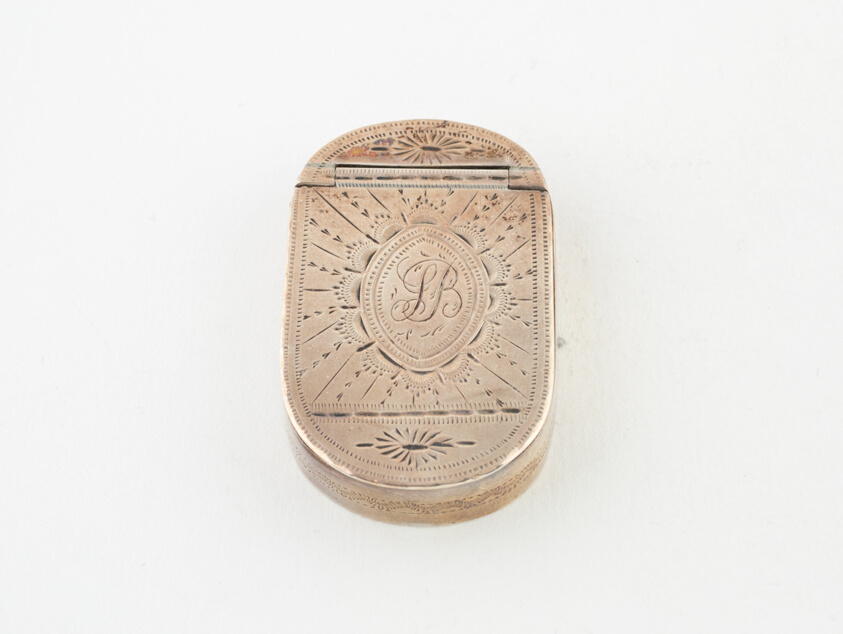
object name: Metalwork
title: Box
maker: Samuel Pemberton (Birmingham, England)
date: c. 1797/98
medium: Silver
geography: Birmingham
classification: container for personal use; box; european decorative arts; metalwork; silver; decorative object/ornament